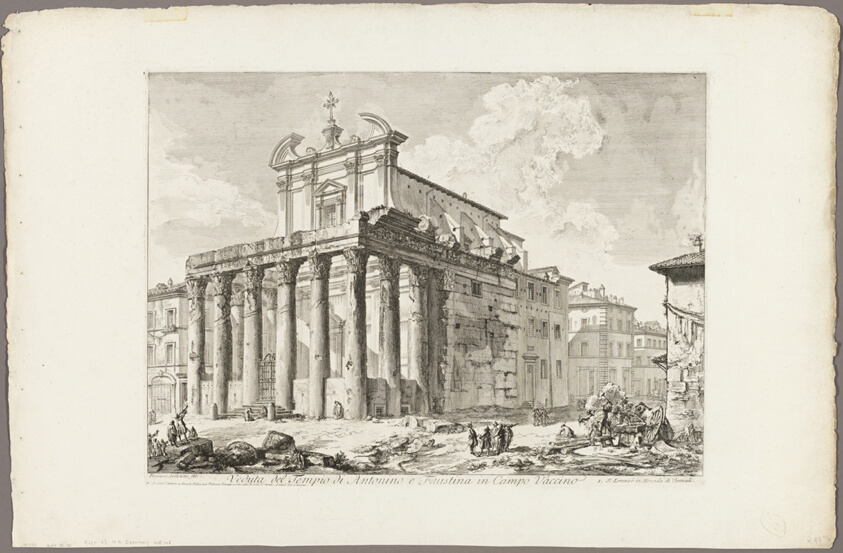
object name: Print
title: View of the Temple of Antoninus and Faustina in the Roman Forum, from Views of Rome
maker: Giovanni Battista Piranesi (Italian, 1720-1778)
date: 1750/59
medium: Etching on heavy ivory laid paper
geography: Italy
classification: etching; print; prints and drawing